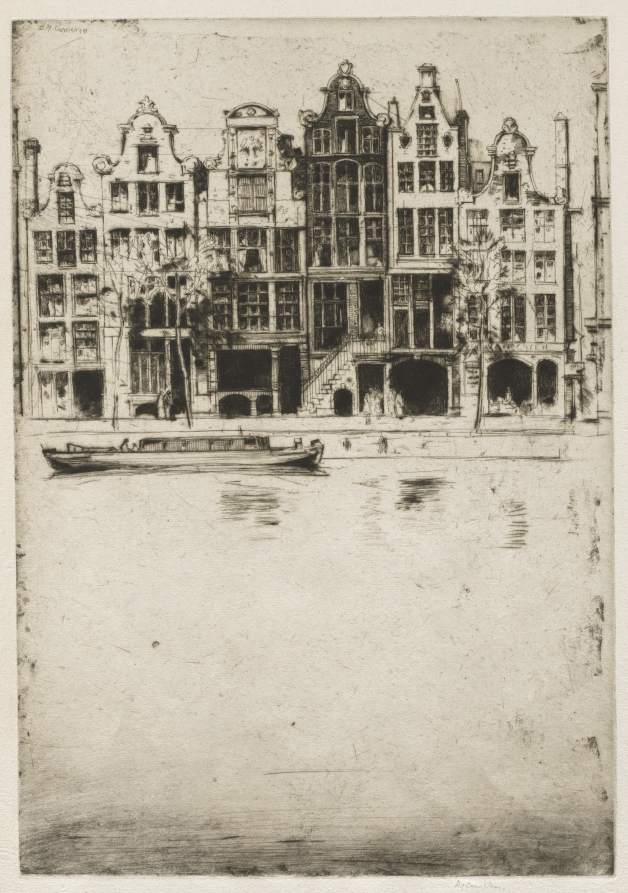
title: Souvenir d'Amsterdam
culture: England, 20th century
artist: David Young Cameron (British, 1865–1945)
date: 1915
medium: etching and drypoint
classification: Print